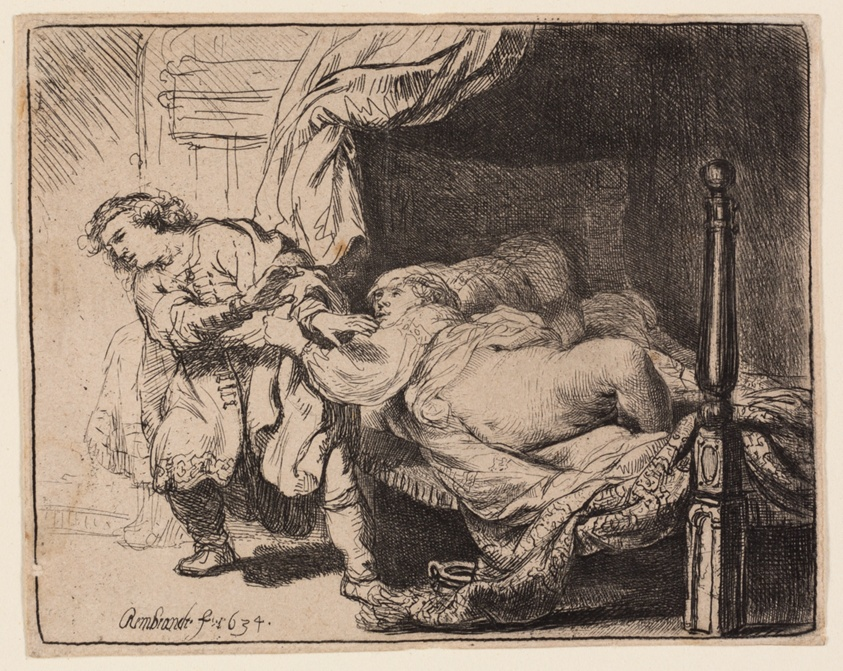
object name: Print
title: Joseph and Potiphar's Wife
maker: Rembrandt van Rijn (Dutch, 1606-1669)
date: 1634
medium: Etching on buff laid paper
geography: Holland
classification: etching; print; prints and drawing; paper